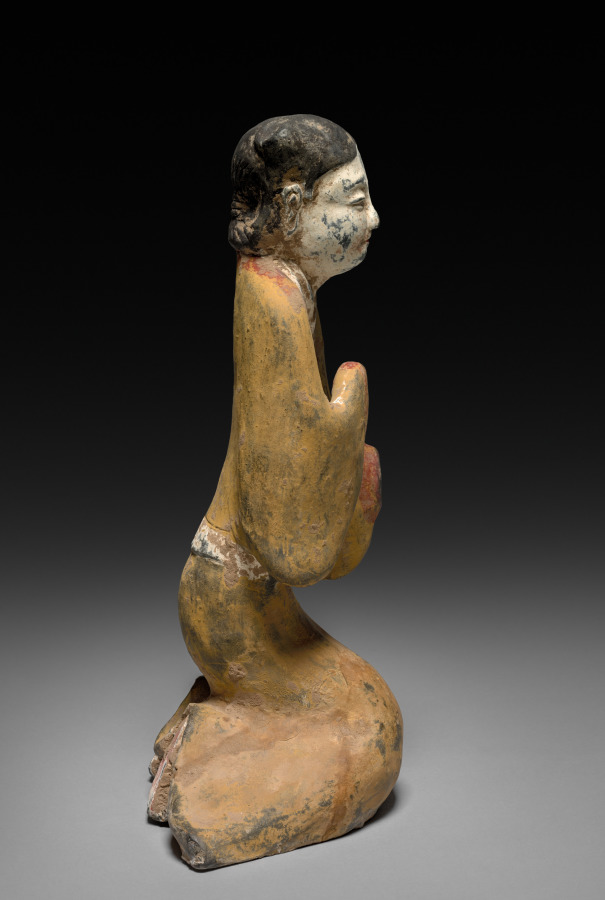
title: Kneeling Woman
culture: China, Western Han dynasty (206 BCE–8 CE) to Eastern Han dynasty (25–220 CE)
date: 100 BCE–100 CE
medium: painted earthenware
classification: Sculpture